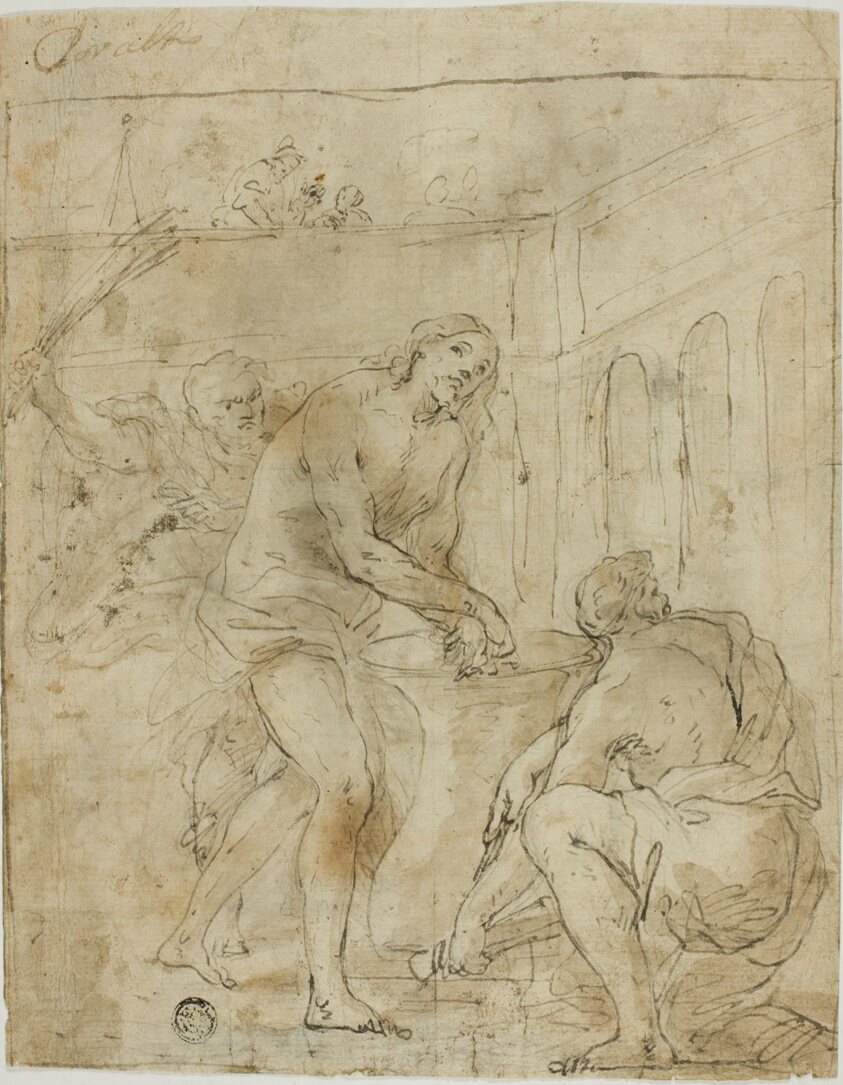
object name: Drawing and Watercolor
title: Flagellation of Christ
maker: Attributed to Lorenzo Garbieri (Italian, 1580-1654); or possibly after Andrea Sacchi (Italian 1599-1661)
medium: Pen and brown ink, with brush and brown wash, over black chalk, on cream laid paper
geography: Italy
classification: pen and ink drawings; drawings (visual works); prints and drawing